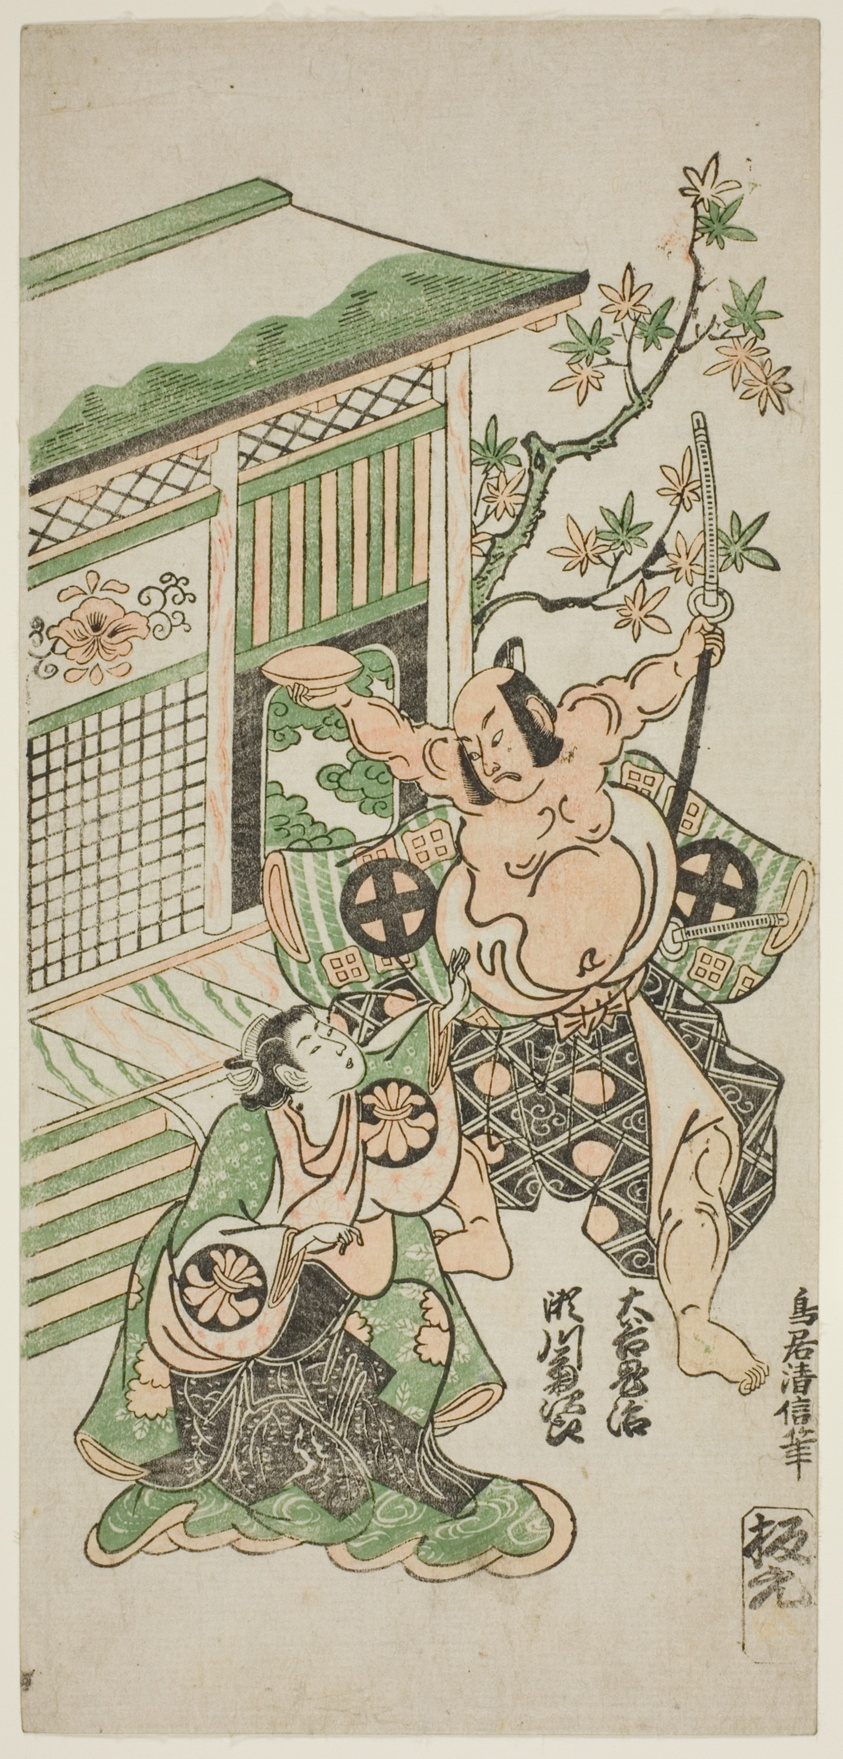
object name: Print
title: The Actors Segawa Kikujiro I as Nobutsura's wife Karumo and Otani Oniji I as Tahara Matataro in the play "Shusse Momijigari," performed at the Ichimura Theater in the eleventh month, 1747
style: Japanese (culture or style)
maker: Torii Kiyonobu II (Japanese, active c. 1725-61)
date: 1747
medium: Color woodblock print; hosoban, benizuri-e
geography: Japan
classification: woodblock print; print; asian art